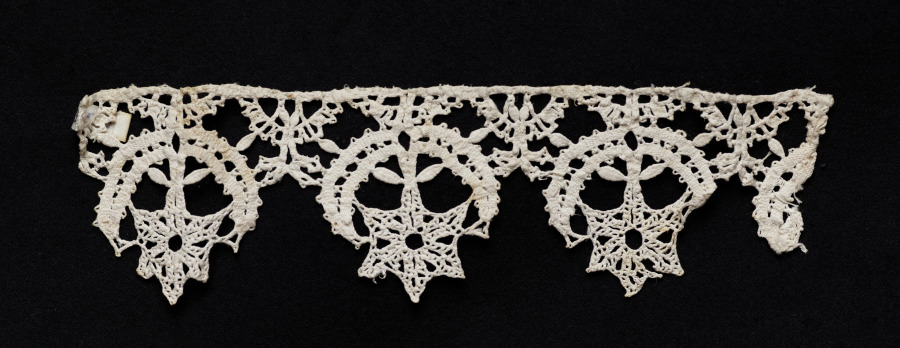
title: Lace Edging of Star Points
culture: Italy, Genoa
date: 1550–99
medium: Bobbin lace (needle lace, punto in aria design)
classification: Lace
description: An example of this lace pattern was exhibited at the 1907 Exposition in Rome. It was entry number 147.